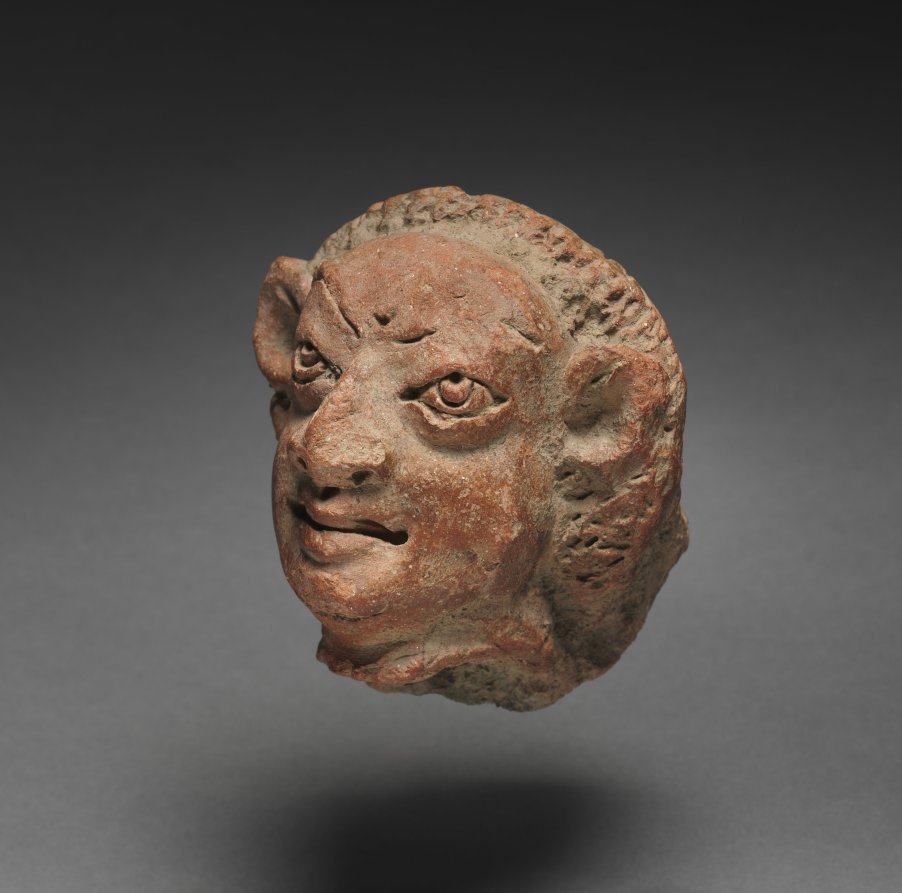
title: Grotesque Male Head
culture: India, Gupta period (320–647)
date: c. 400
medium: terracotta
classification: Sculpture